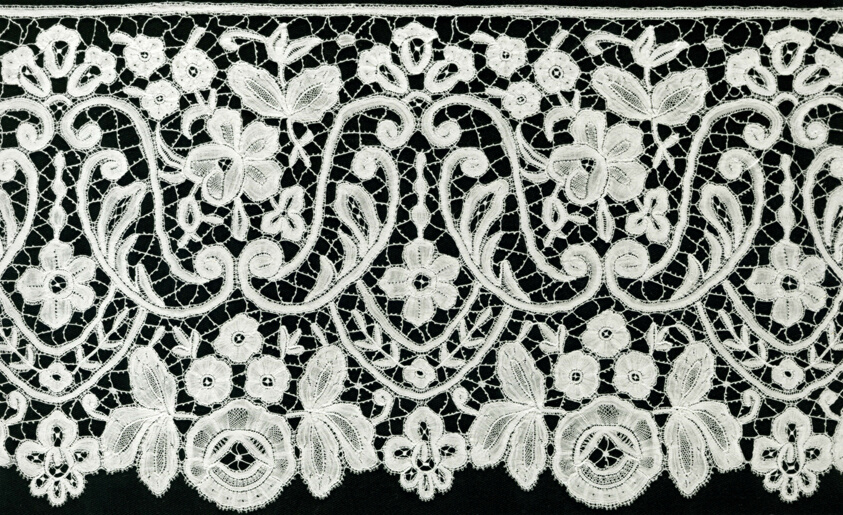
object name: Textile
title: Flounce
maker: Belgium, probably Bruges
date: 1865/85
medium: Cotton, bobbin part lace of a type known as "Duchesse de Bruges"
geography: Belgium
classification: textile; lace - bobbin